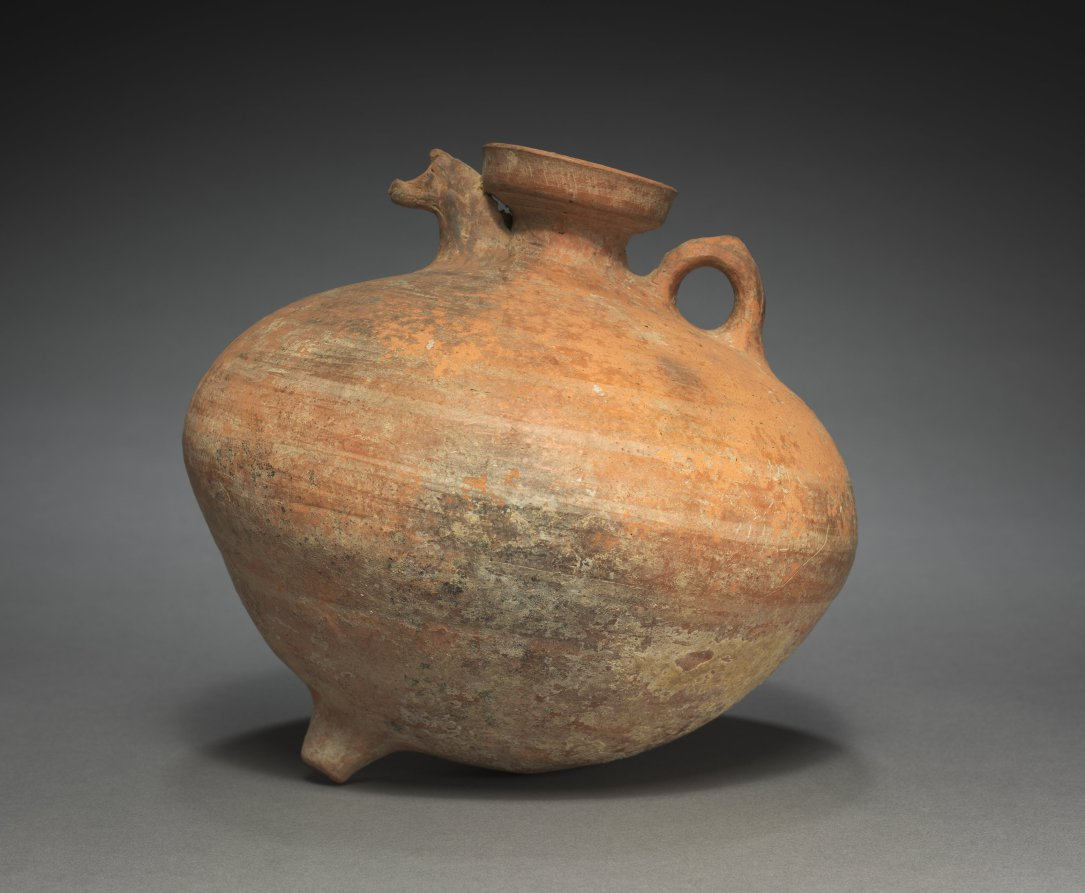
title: Rhyton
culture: Iran, Amlash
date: c. 1000–800 BCE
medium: terracotta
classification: Ceramic